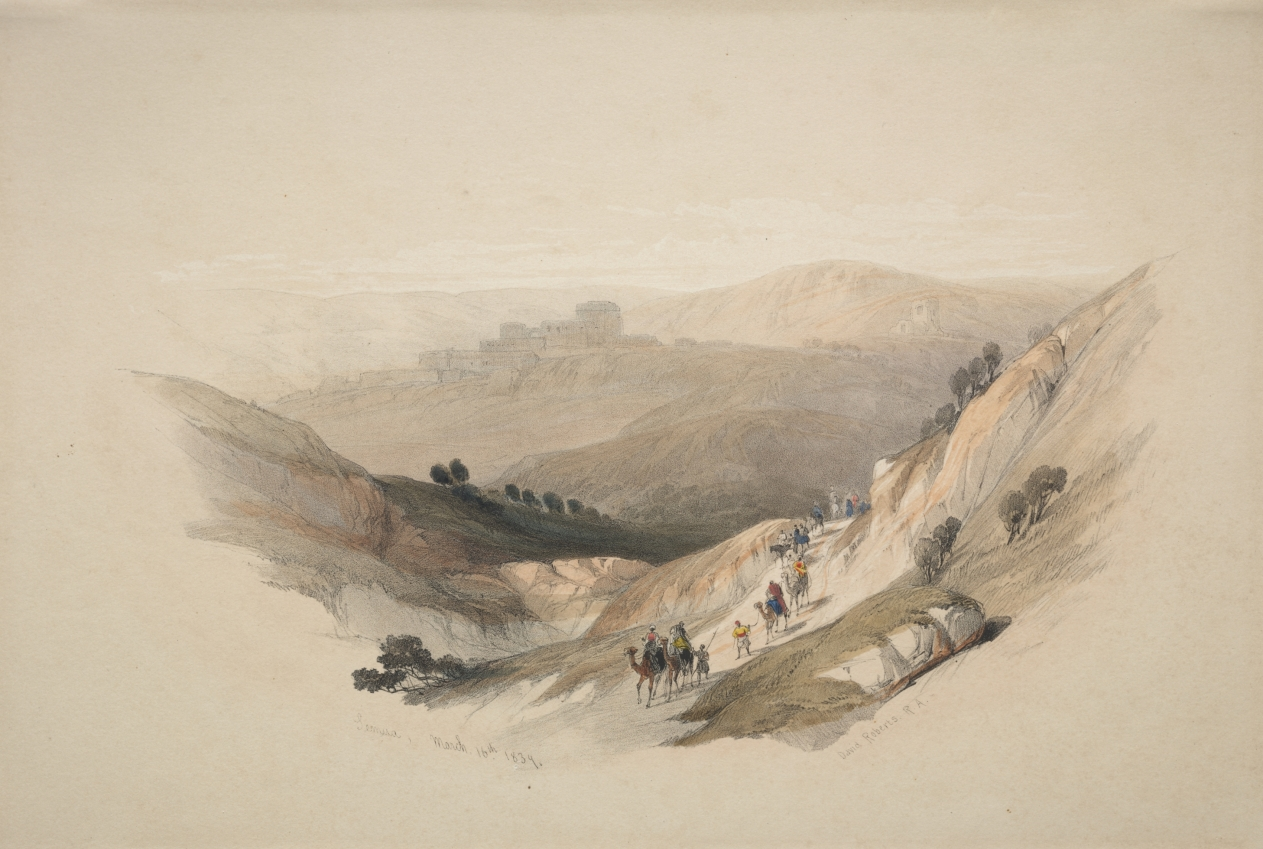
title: Semua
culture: England, 19th century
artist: David Roberts (Scottish, 1796–1864)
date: 1839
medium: color lithograph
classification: Print